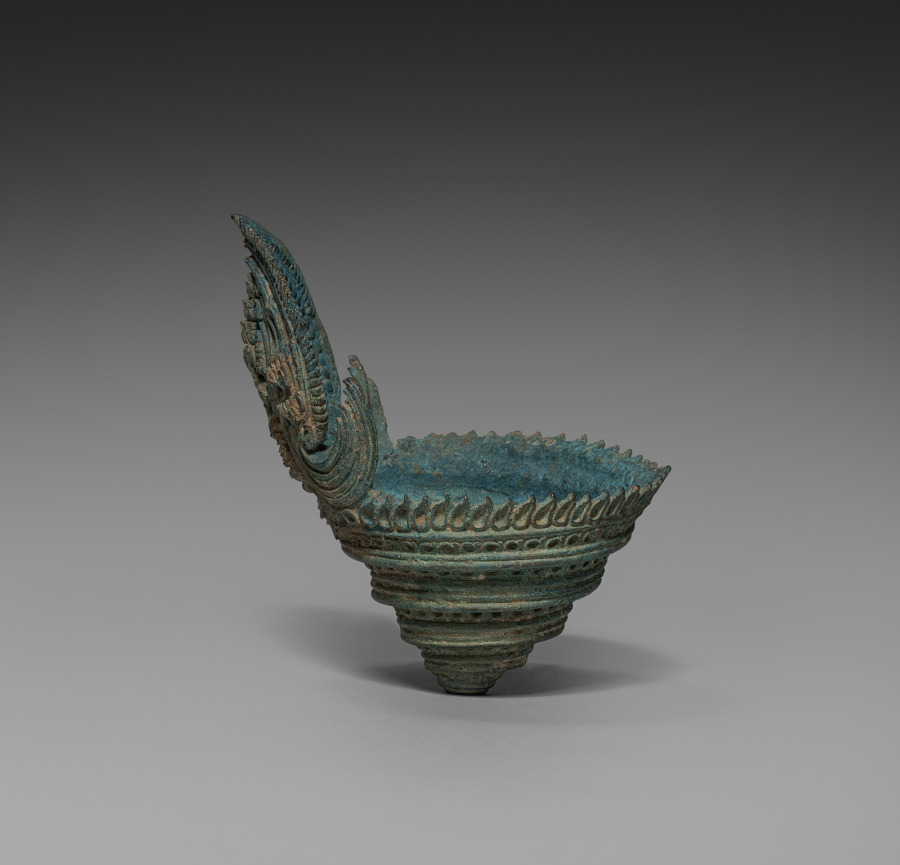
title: Ritual conch shell base with dancing Hevajra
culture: Cambodia, Khmer, Angkor Period, 12th-13th Century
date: 1100s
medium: shell and bronze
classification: Sculpture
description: A royal temple like Banteay Chhmar was built for performing rituals and to honor images of gods, Buddhas, and other sacred or enlightened beings for the sake of the kingdom’s protection and ongoing prosperity. Conch shells were blown at the start of rituals to make the sound corresponding to the syllable om. The dancing figure of Hevajra, a Buddhist being of enlightenment with eight heads, sixteen arms, and four legs, has been worked into the bronze embellishment of the shell. Hevajra was elevated to a prominent position in Khmer Buddhism of the Angkorian period as the standard figure denoting the practice of rituals prescribed in a text called the Hevajra-tantra. The tripod stand with three serpents is probably not original to the shell.